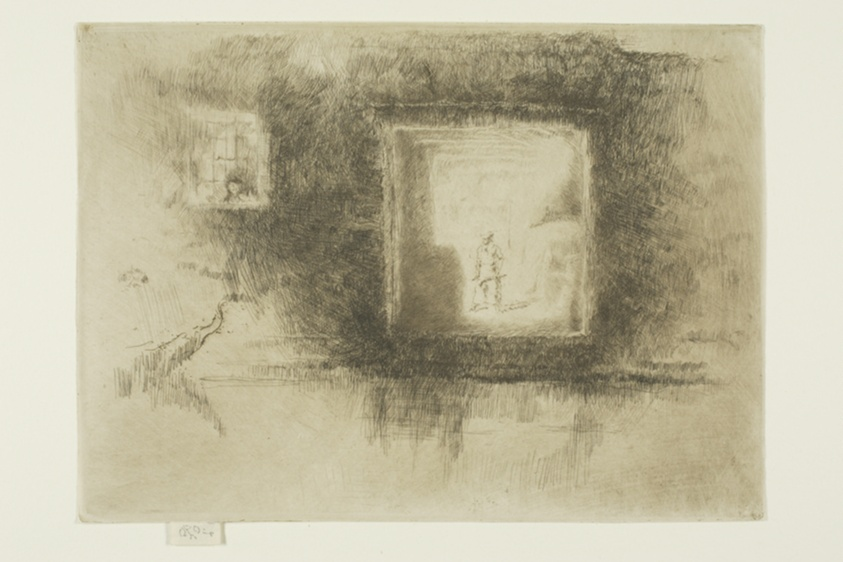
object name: Print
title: Nocturne: Furnace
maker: James McNeill Whistler (American, 1834-1903)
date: 1879/80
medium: Etching and drypoint with foul biting in dark brown ink on Asian laid paper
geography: United States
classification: etching; foul biting; print; prints and drawing; drypoint; paper